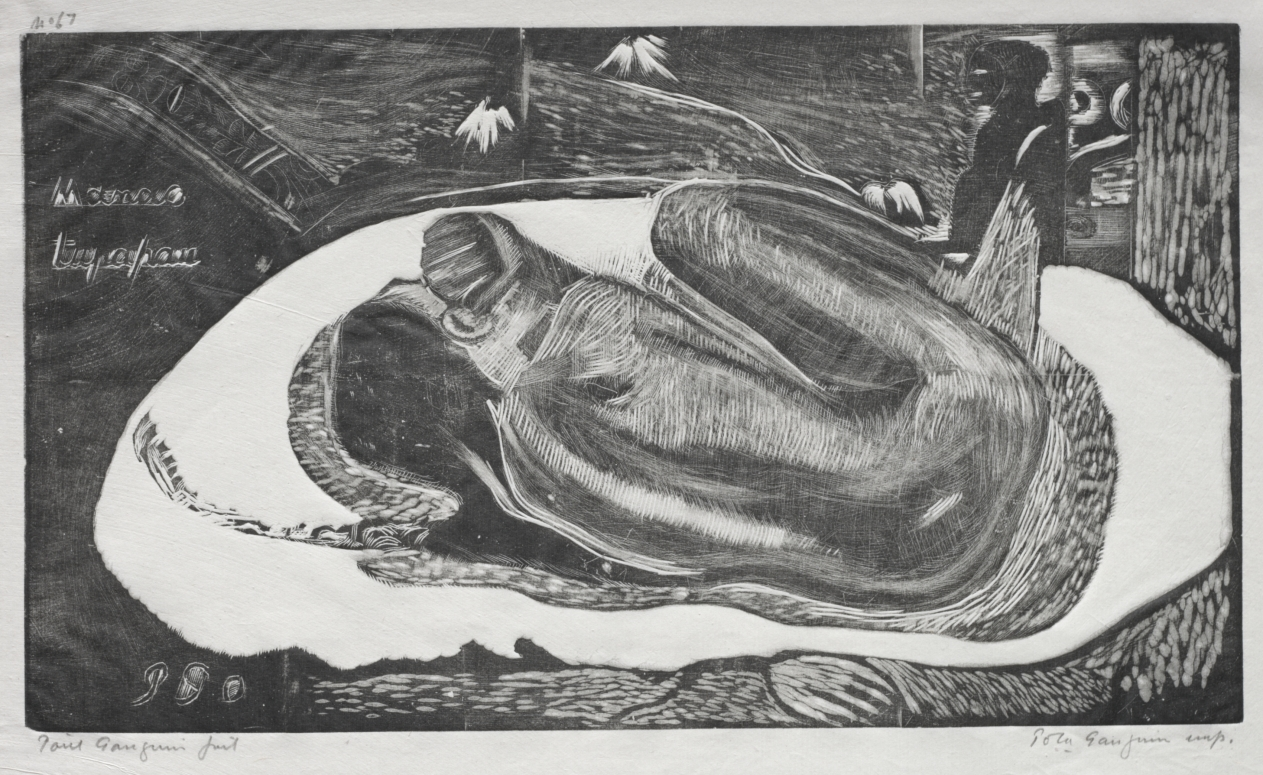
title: Noa Noa: Manao Yupapau ( Watched by the Spirts of the Dead)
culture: France, 19th century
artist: Paul Gauguin (French, 1848–1903)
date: 1893–94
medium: woodcut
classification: Print